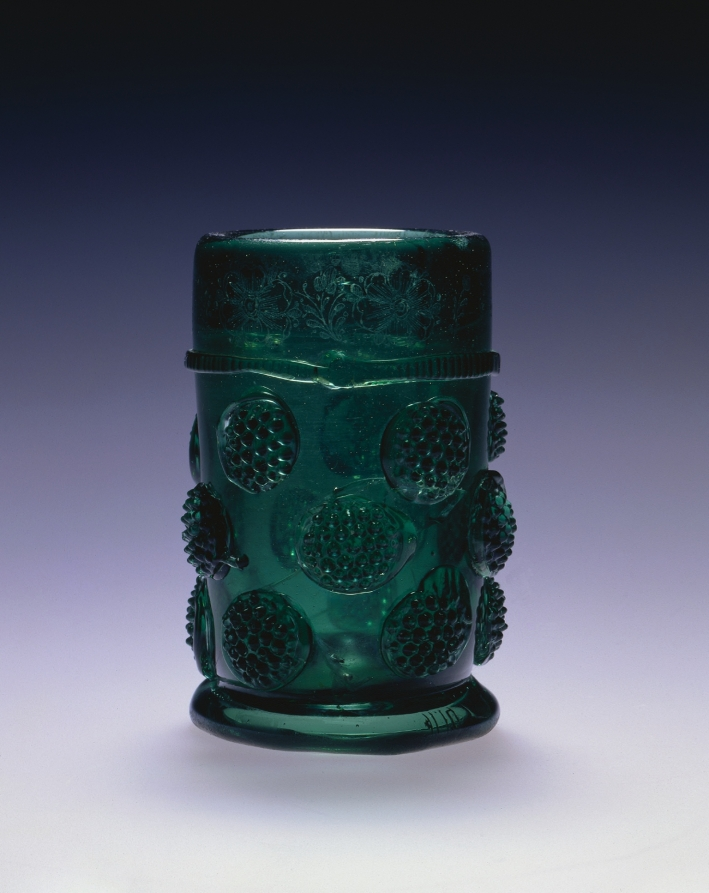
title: Beaker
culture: Germany, probably Saxony, 17th century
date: 1653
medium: green glass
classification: Glass